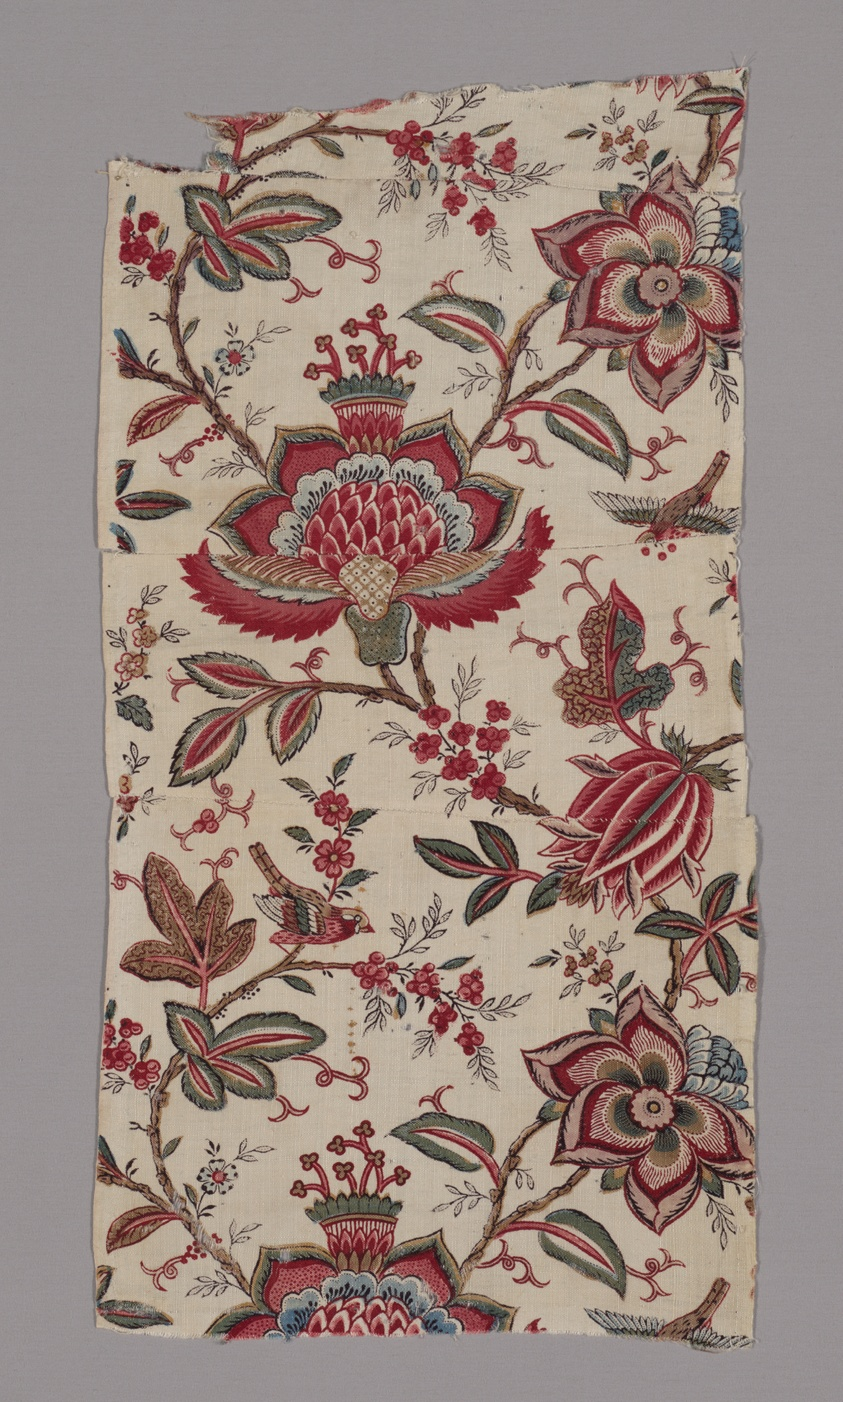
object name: Textile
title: Fragment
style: jouy-en-Josas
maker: France, probably Jouy-en-Josas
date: 18th century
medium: Cotton, plain weave; block printed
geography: France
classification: textile; weaving - printed